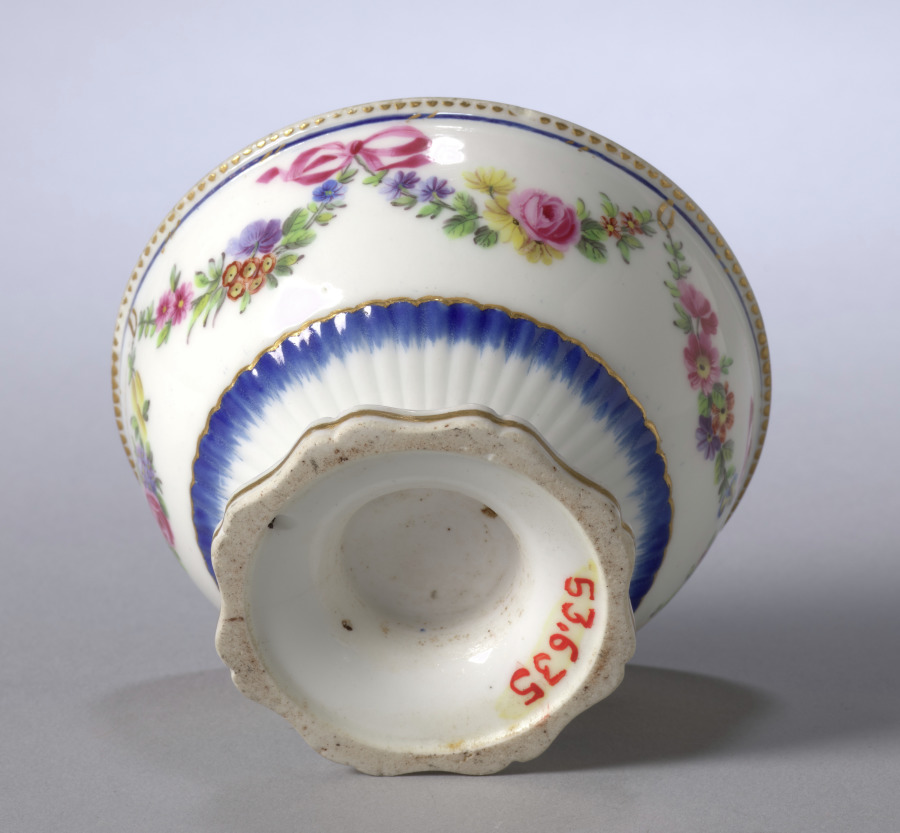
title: Soap Box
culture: France, Sèvres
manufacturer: Sèvres Porcelain Factory (French, est. 1756)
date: c. 1769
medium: soft-paste porcelain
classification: Ceramic